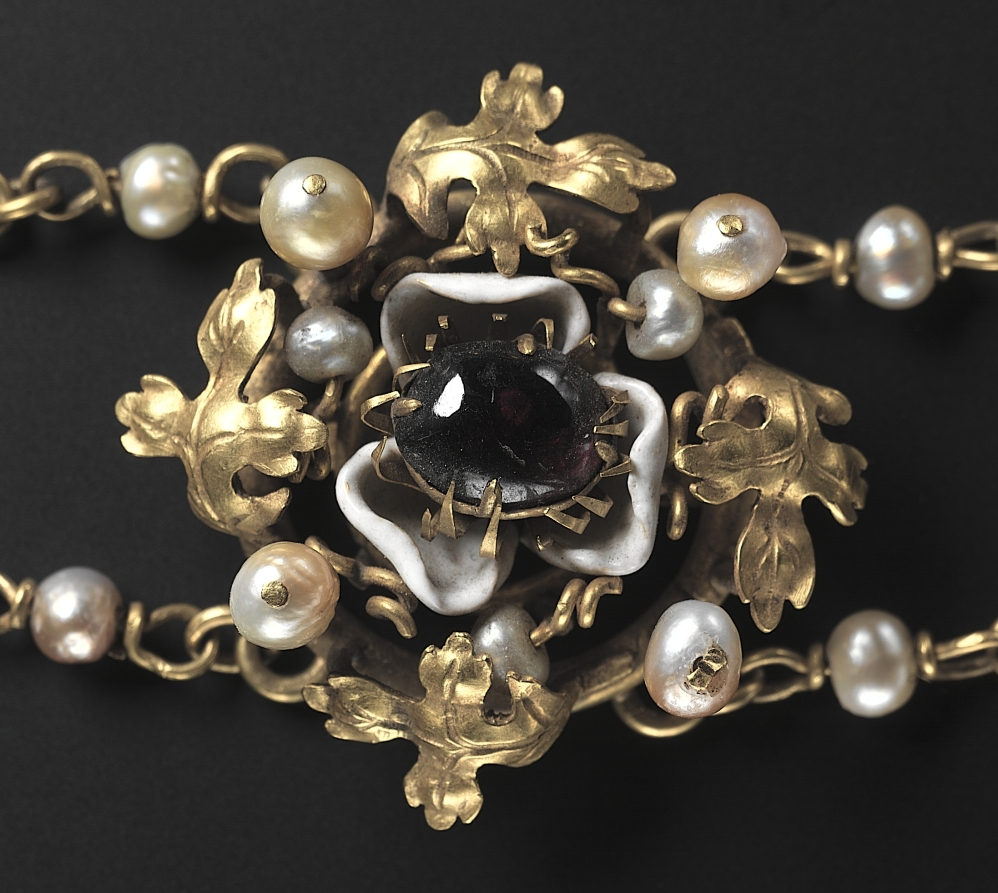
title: Twelve Medallions Mounted as a Necklace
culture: France, Paris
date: c. 1400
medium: enameled gold, precious stones, and pearls; some later additions with modern chain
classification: Jewelry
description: These medallions, which have loops on the backs, must have originally been sewn onto a garment or, more likely, a woman’s headpiece. In spite of the modern chain to which they are now attached, the medallions are unique items of feminine apparel from around 1400. Such items would have been well known at the courts of the Valois in Paris, Bourges, and Dijon. The central medallion with a “white lady” is enameled “in the round”––a new Parisian technique for enameling irregular or three-dimensional surfaces. Such white lady medallions are described in inventories of the period